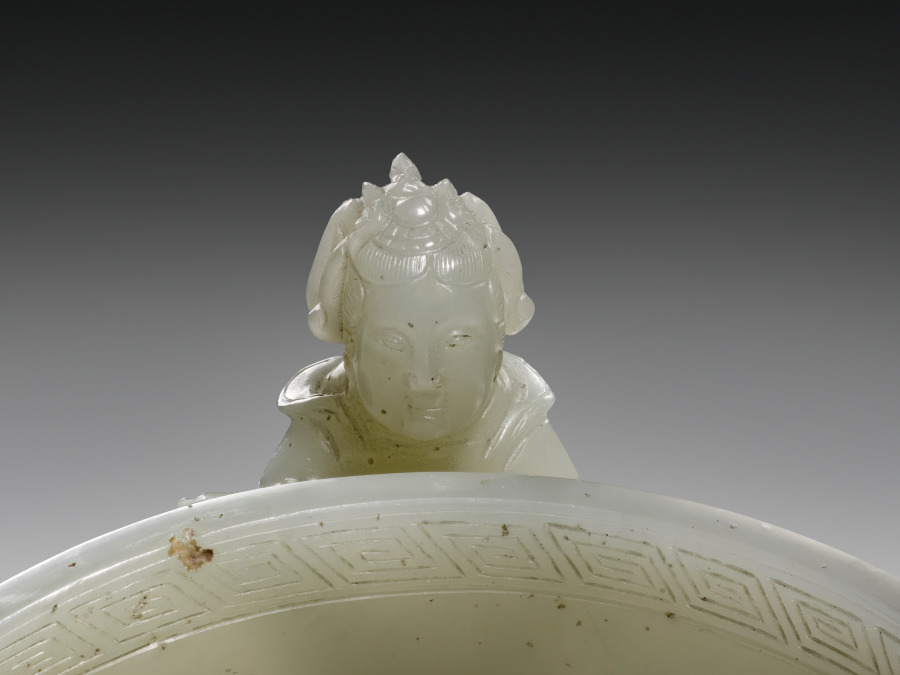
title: Cup with Daoist Figures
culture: China, Qing dynasty (1644–1911), Qianlong period (1736–95)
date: 1736–95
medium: Pale greenish-white jade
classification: Jade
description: During the Qing dynasty, Suzhou’s best products were sent north to the capital. Those that met imperial approval were sometimes graced with Qianlong’s mark, added by calligraphers and jade workers at court. The lack of a Qianlong mark on the Cleveland cup suggests that it might not have reached the court. Previously dated to the Yuan dynasty (1271–1368), new scholarship dates this cup to the Qing period.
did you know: Two female immortals serve as handles, while a Daoist procession with immortals, musicians, and attendants winds around the body of the cup.